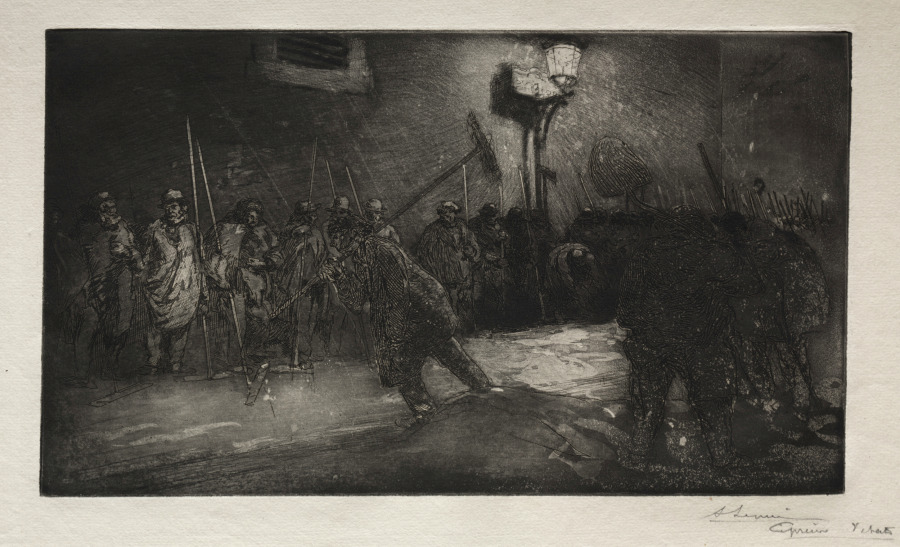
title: L'Appel des Balayeurs de la Nuit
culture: France, 19th century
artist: Auguste Louis Lepère (French, 1849–1918)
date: 1890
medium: etching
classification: Print